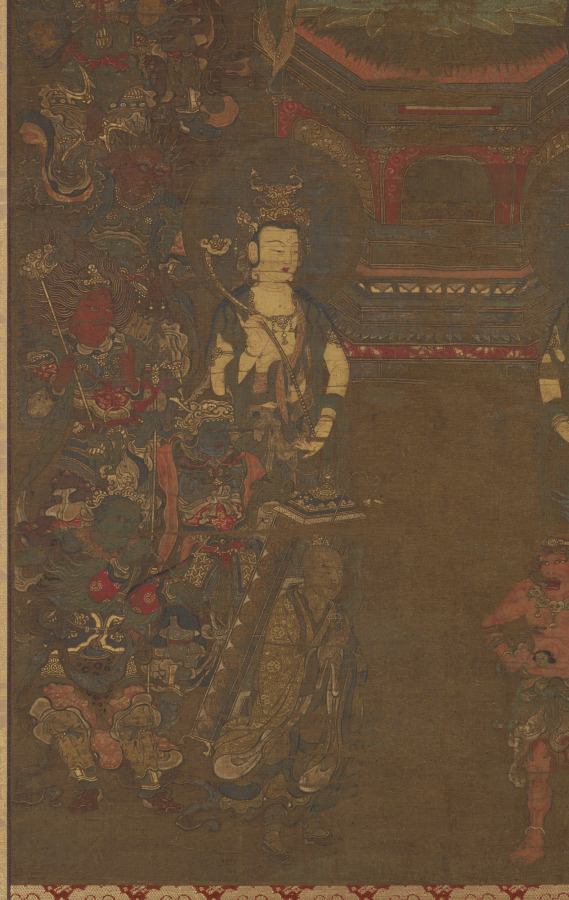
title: Shakyamuni with the Sixteen Benevolent Deities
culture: Japan, Nanbokuchō period (1336–92)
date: mid- to late 1300s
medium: Hanging scroll; ink, color, gold and cut gold on silk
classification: Painting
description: The historical Buddha Shakyamuni forms a triad with the bodhisattvas Fugen and Monju. Sixteen deities who protect the Buddhist scripture called the Great Perfection of Wisdom Sutra surround them. At the bottom left stands the Chinese monk Xuanzang, noted as a Buddhist scholar and translator of religious texts from India, including the Great Wisdom Sutra.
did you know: This painting would have been the main icon for ceremonial readings of the Great Perfection of Wisdom Sutra.